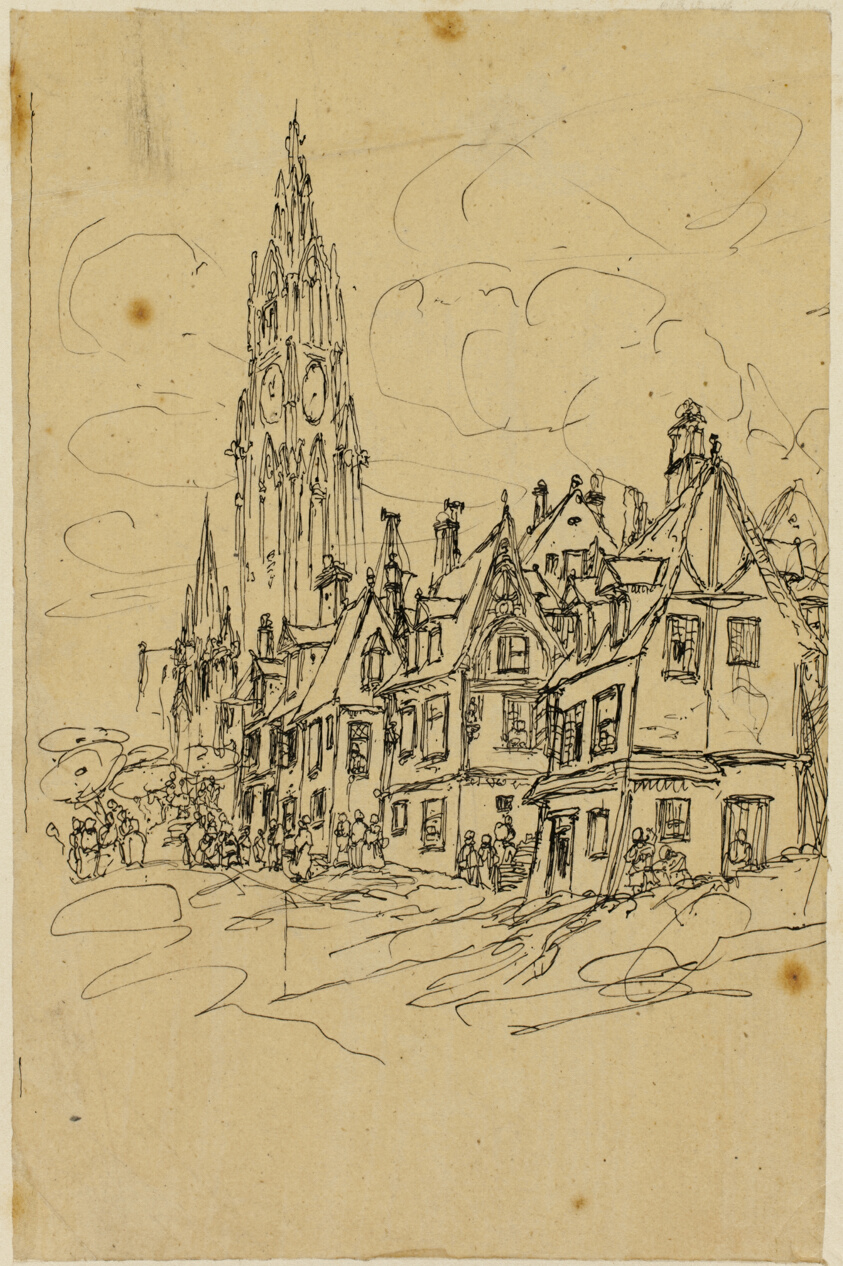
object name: Drawing and Watercolor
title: The Flemish Belfry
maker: Rodolphe Bresdin (French, 1825-1885)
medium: Pen and black ink, on tan tracing paper, laid down on buff wove paper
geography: France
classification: pen and ink drawings; drawings (visual works); prints and drawing